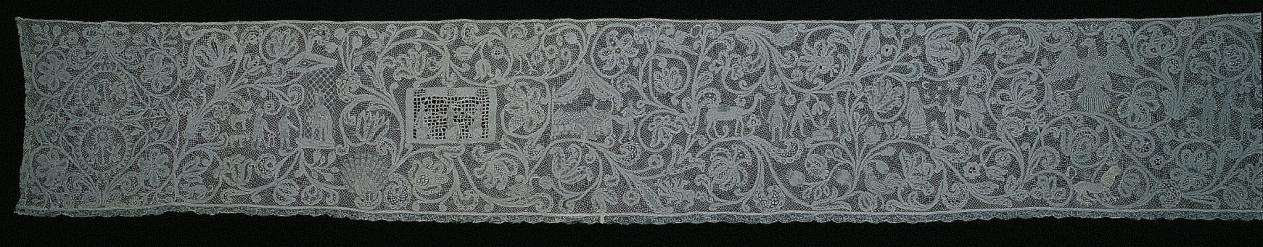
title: Lace Flounce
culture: Italy, Milan(?)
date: 1750–99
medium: Linen: bobbin lace (Punto di Milano)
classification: Lace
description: Being the most prestigious material, lace was used extensively by the 1600s for altar linen and for trimming priest’s albs, often incorporating finely rendered religious images amid blossoming vines. This alb flounce depicts scenes from the Old Testament story of Joseph, whose jealous brothers sold him to a caravan bound for Egypt. Joseph later interpreted dreams of the pharaoh, who made him ruler. When famine in Canaan caused Joseph’s ten brothers to travel to Egypt in search of food, they bowed down to him. After he revealed his identity, he forgave his brothers and God saved the family.